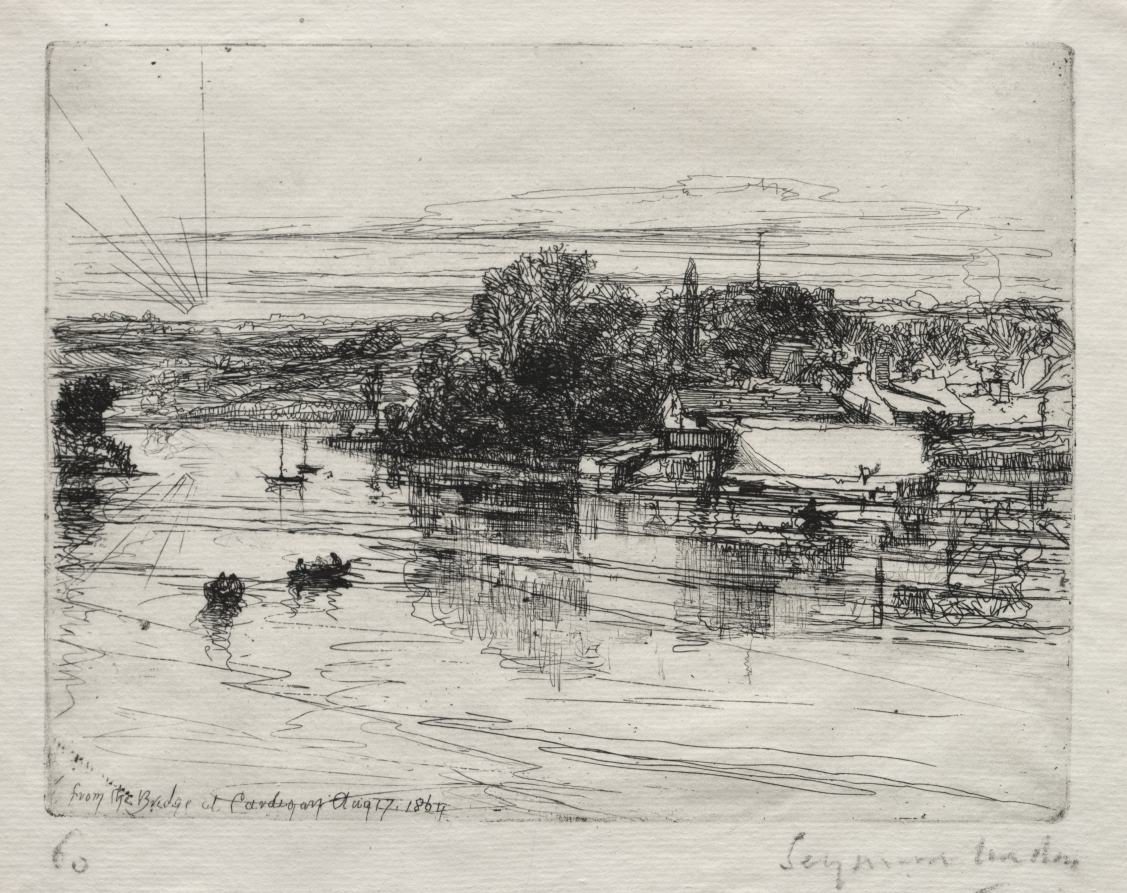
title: Cardigan Bridge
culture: England, 19th century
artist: Francis Seymour Haden (British, 1818–1910)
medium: etching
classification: Print